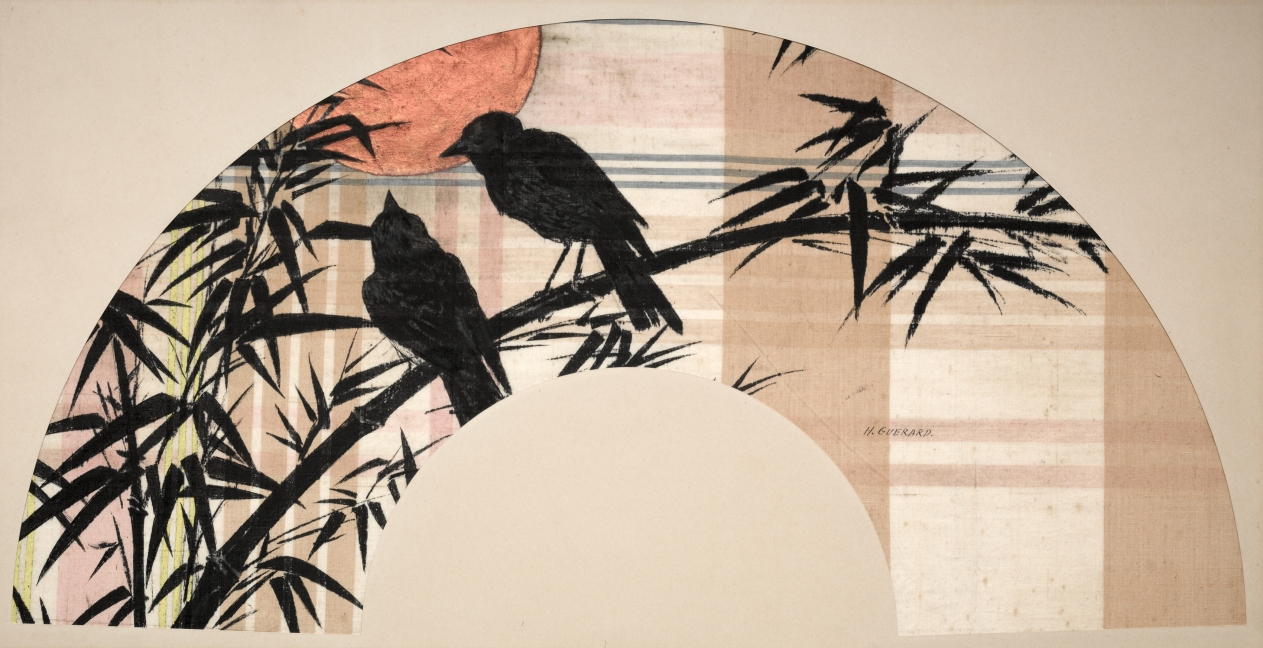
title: Fan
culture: France, 19th century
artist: Henri Charles Guérard (French, 1846–1897)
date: c. 1890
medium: black ink, watercolor, and tinted metal leaf on patterned fabric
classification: Drawing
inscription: signed in ink